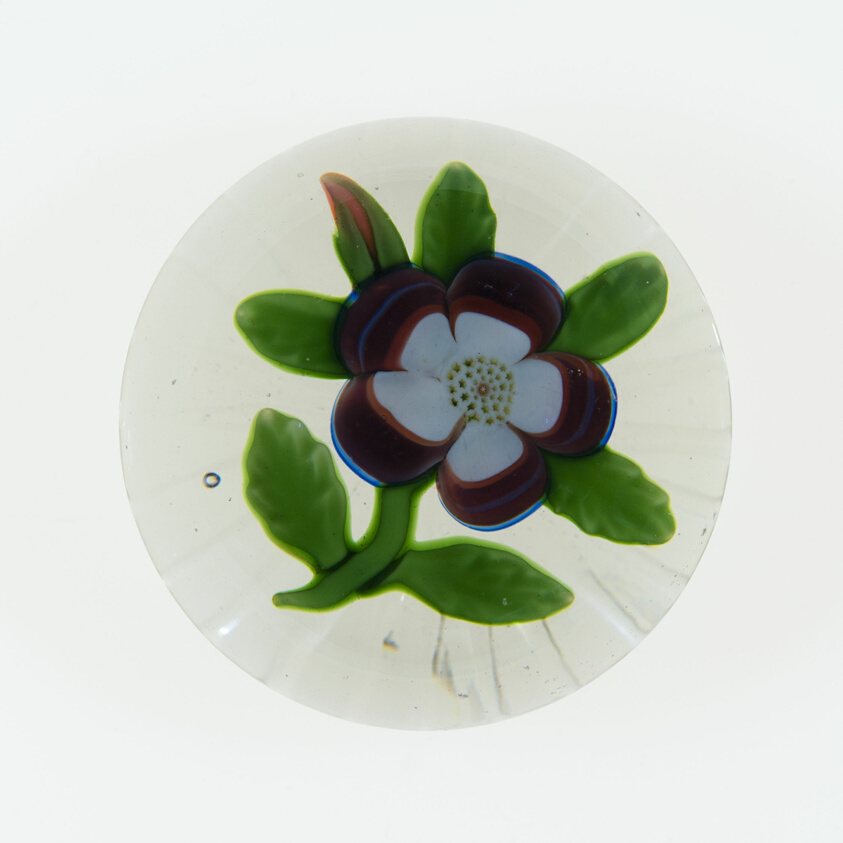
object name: Glass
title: Paperweight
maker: Baccarat Glassworks (Cristalleries de Baccarat); Lorraine, France, founded 1764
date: c. 1845–60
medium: Glass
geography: Baccarat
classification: paperweight; glass